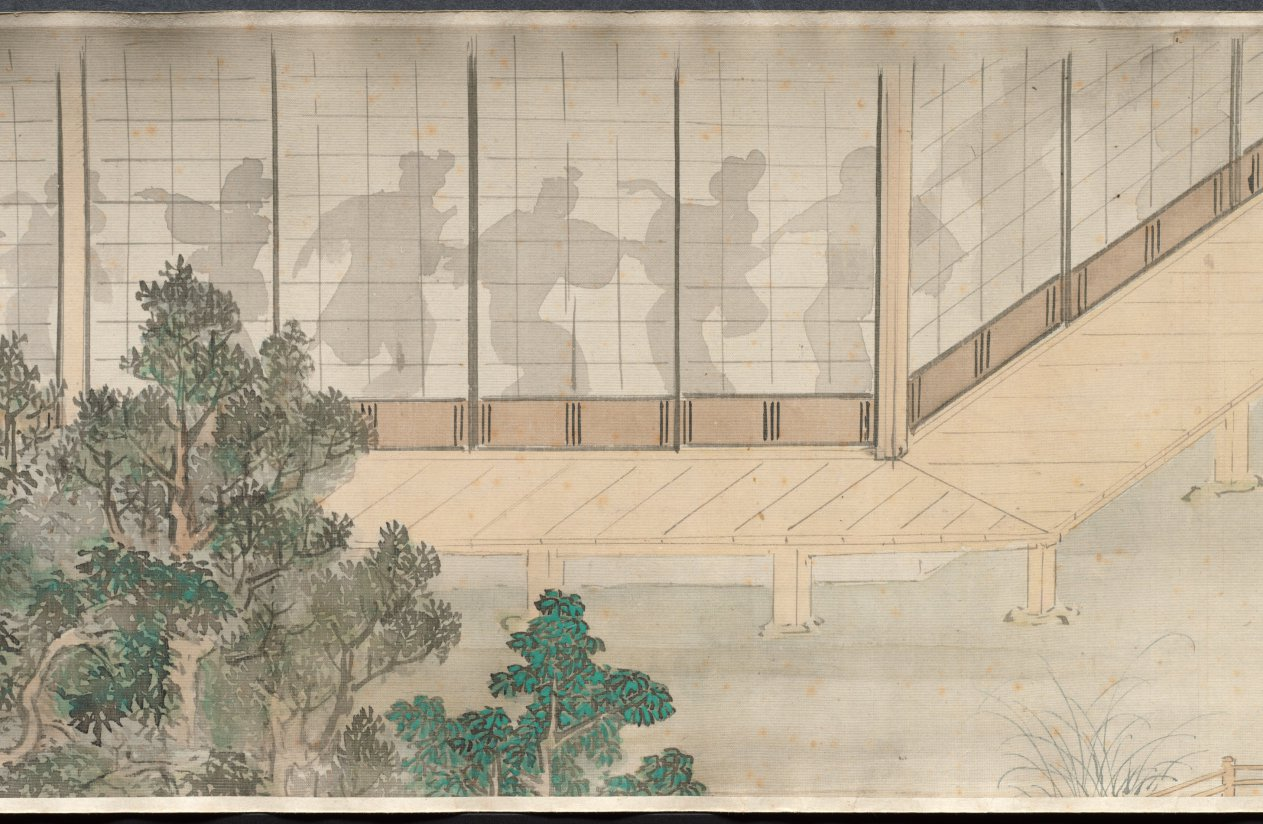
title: The Shadow Dancers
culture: Japan, Edo period (1615–1868)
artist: Yamamoto Baiitsu (Japanese, 1783–1856)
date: 1800s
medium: handscroll, ink and color on silk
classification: Painting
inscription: artist's signature and two seals at end of painting.